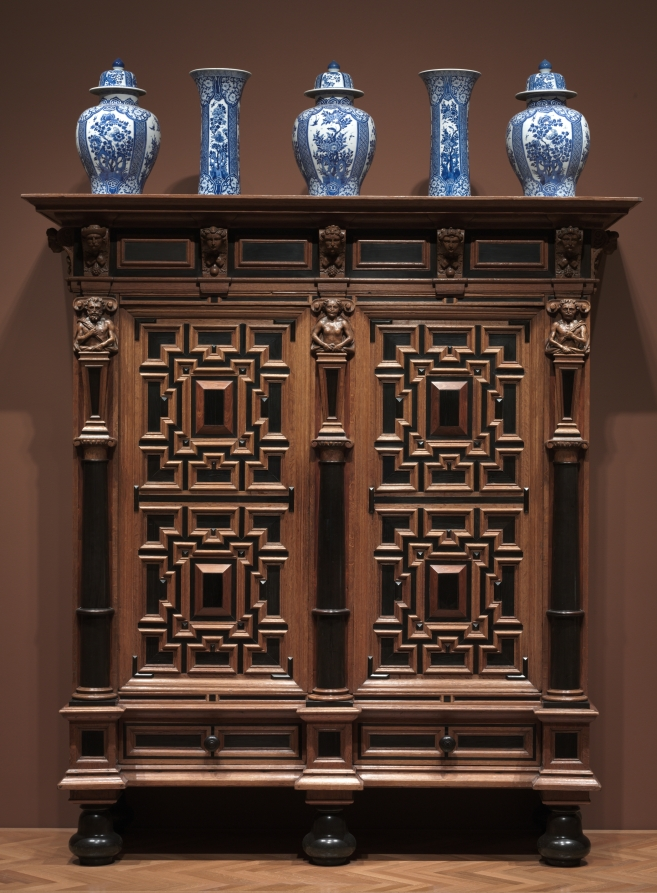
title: Wardrobe (Kast)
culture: Netherlands, Holland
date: c. 1625–50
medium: oak with ebony and rosewood veneers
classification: Furniture and woodwork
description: After the founding of the Dutch East India Company in 1602, the use of exotic, imported wood veneers in furniture became more prevalent. So too did the use of perspective and mathematical systems in laying out the veneers. The combination produced a style of decoration that spread across Europe and even to the young colonies in America.